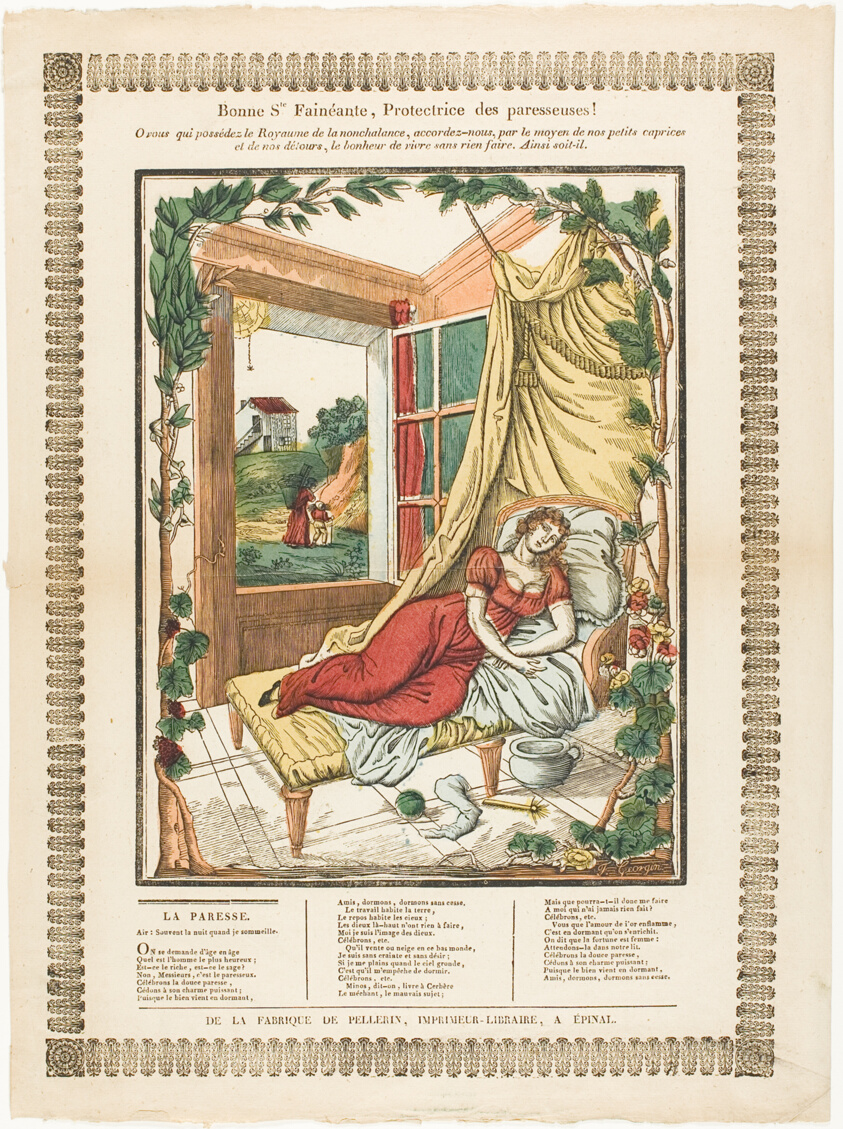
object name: Print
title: Bonne Ste. Fainéante, Protectrice des paresseuses!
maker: François Georgin (French, 1801-1863); published Epinal Pellerin (French, 19th century)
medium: Hand-colored woodcut with typeset text underlay and decorative border on cream wove paper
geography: France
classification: woodcut; print; prints and drawing